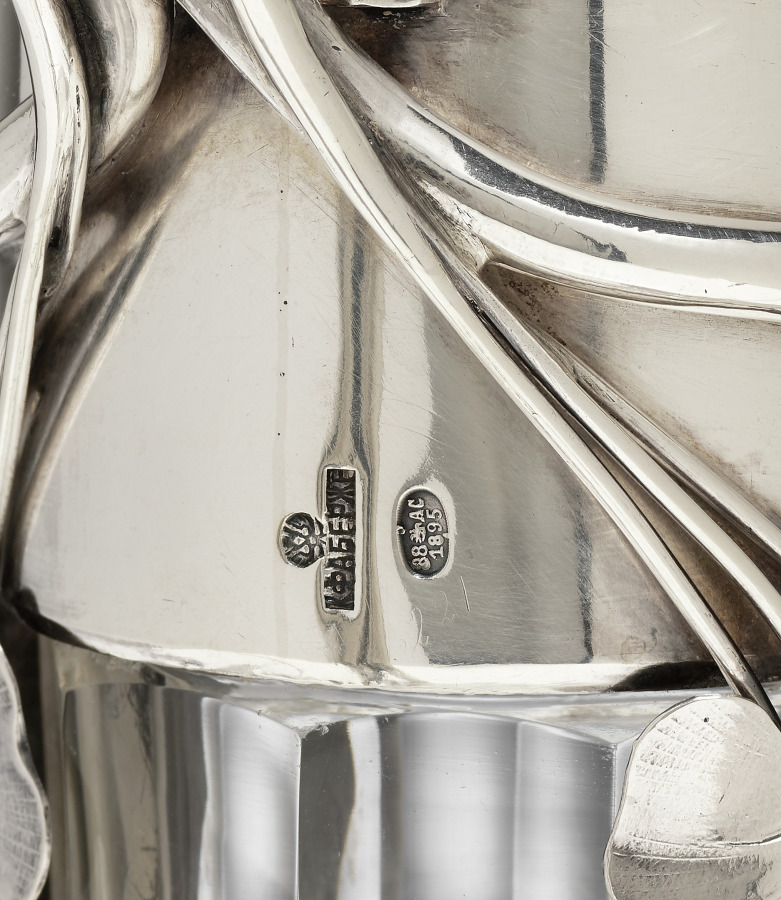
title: Jug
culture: Russian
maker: House of Fabergé (Russian, 1842–1918)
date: 1895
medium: silver, cut glass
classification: Glass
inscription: "K. Faberge" in Cyrillic, surmounted by the double-headed Imperial eagle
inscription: "88" silver standard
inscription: St. Peterburg coat of arms (St. George and the dragon)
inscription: Cyrillic initials "AC"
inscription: "1895"